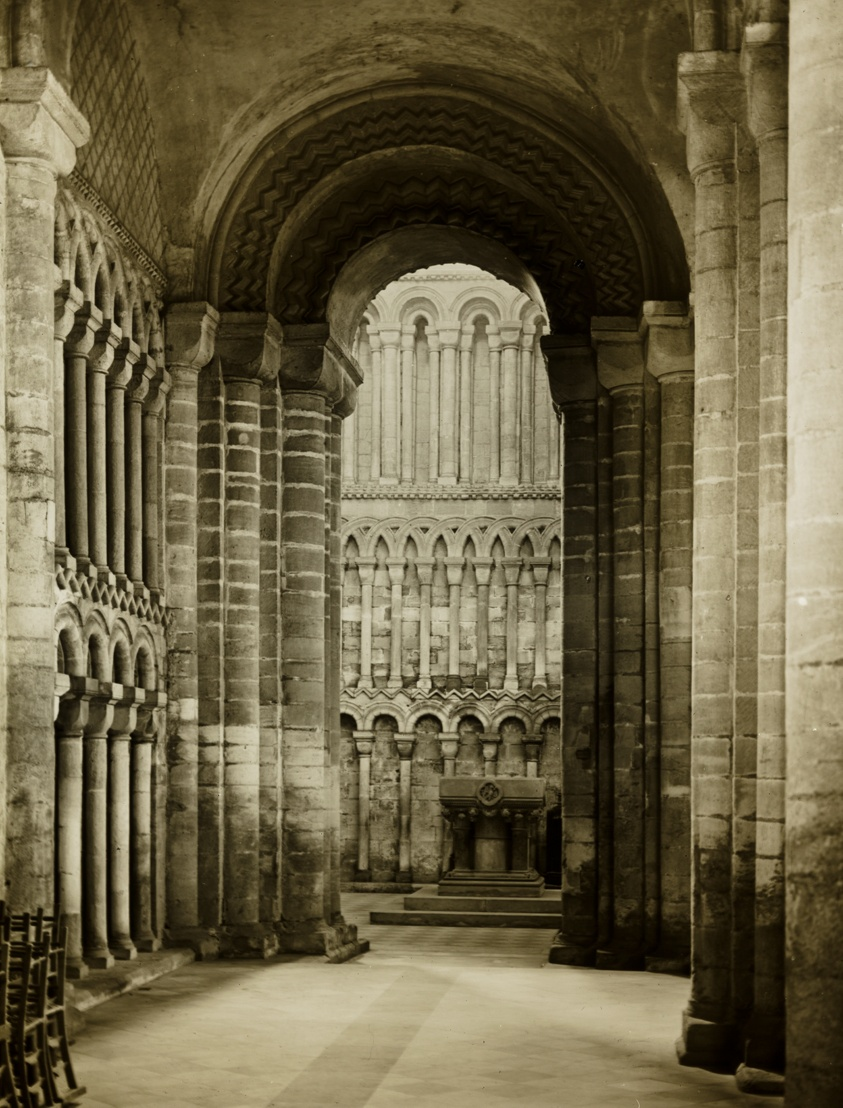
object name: Photograph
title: Ely Cathedral: West End of South Aisle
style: Pictorialism, 19th century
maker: Frederick H. Evans (English, 1853–1943)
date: c. 1891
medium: Lantern slide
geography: England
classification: photograph; photography